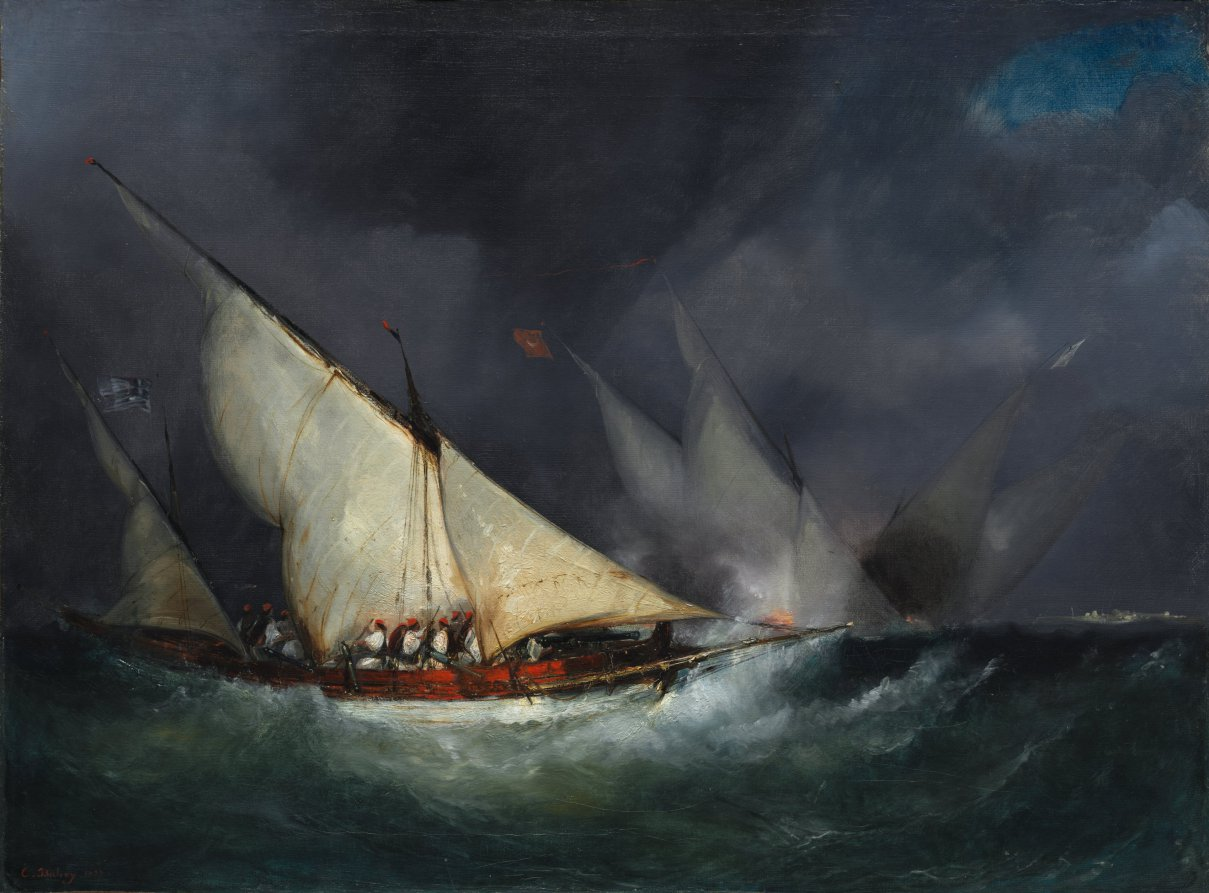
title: Greek Pirates Attacking a Turkish Vessel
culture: France, 19th century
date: not dated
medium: oil on fabric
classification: Painting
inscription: Signed lower left: E Isabey. 1827